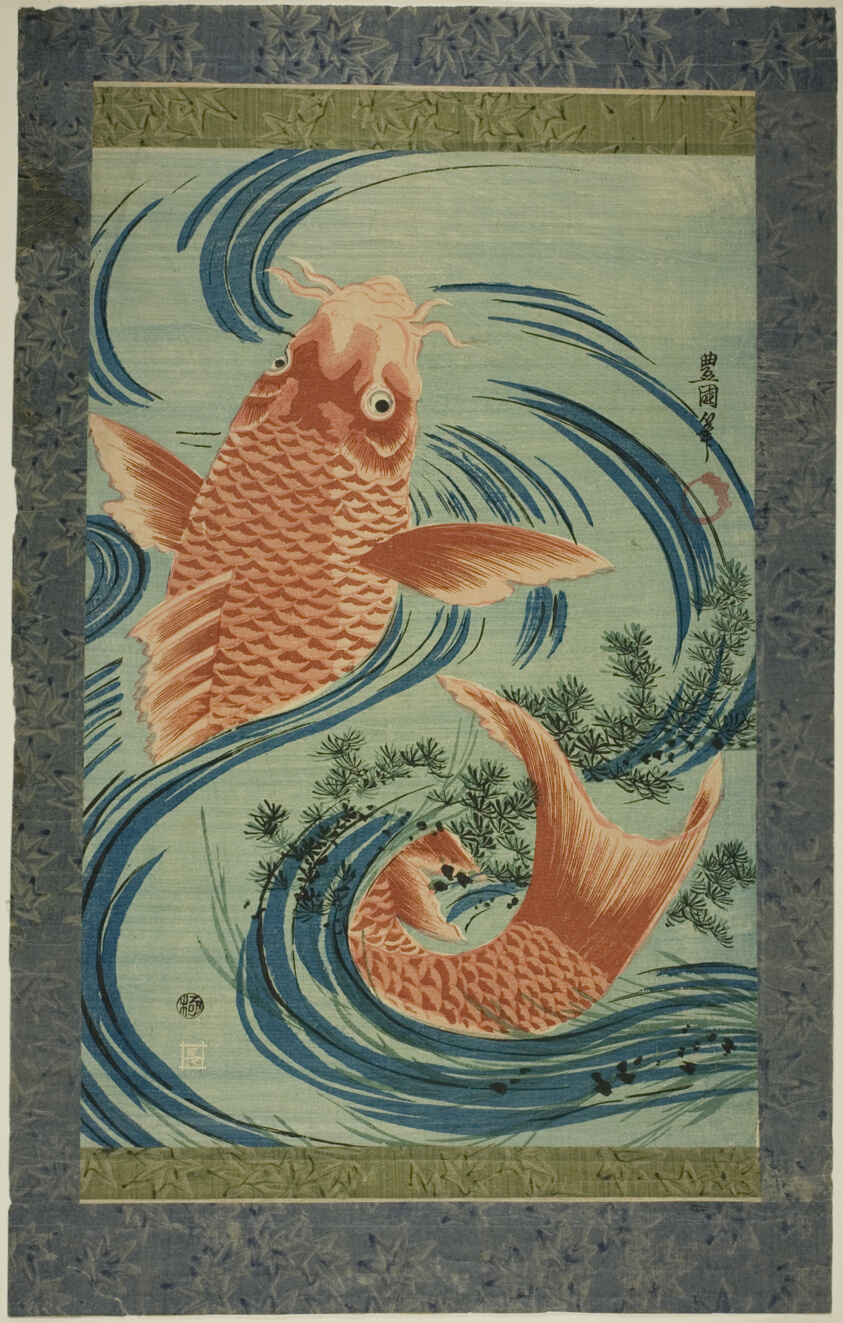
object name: Print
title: The Red Carp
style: Japanese (culture or style)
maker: Utagawa Toyokuni I 初代 歌川 豊国; Japanese, 1769–1825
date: c. 1804/18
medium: Color woodblock print; oban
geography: Japan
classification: woodblock print; print; asian art